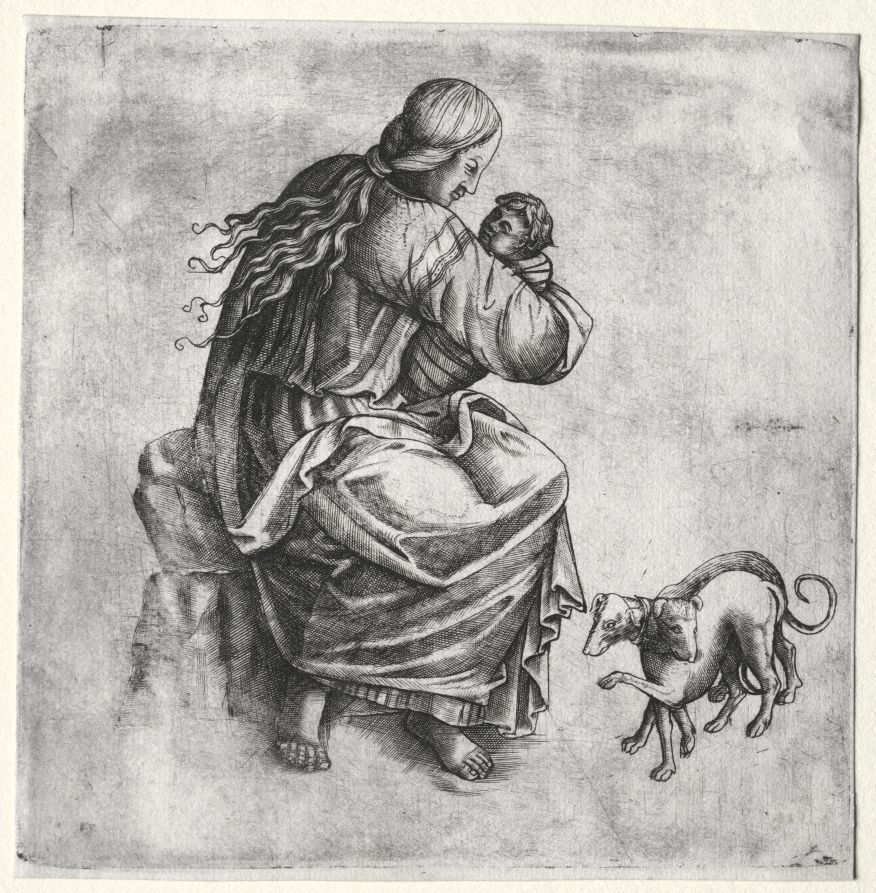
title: Mother and Child with Two Dogs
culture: Italy, late 15th Century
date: late 1400s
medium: engraving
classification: Print